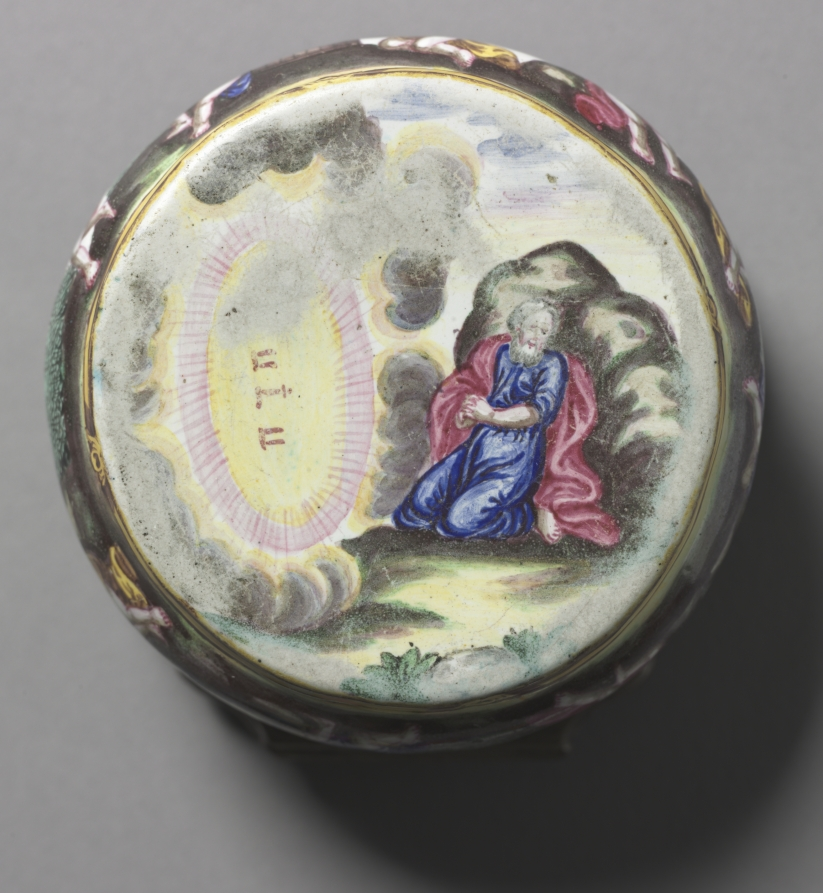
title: Box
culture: Italy or Germany, 18th century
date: 1700s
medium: enamel on copper, metal mounts with traces of gilding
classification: Miscellaneous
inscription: inside box appear the letters "FB" in monogram.